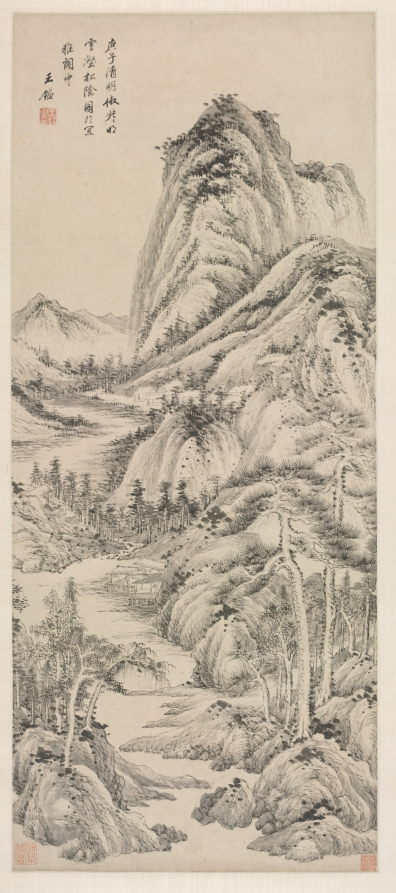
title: Shade of Pines in a Cloudy Valley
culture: China, Qing dynasty (1644-1911)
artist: Wang Jian (Chinese, 1598–1677)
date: 1660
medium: Hanging scroll; ink on paper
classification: Painting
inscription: Artist's inscription, signature, and seal: Painted at Yiyage in imitation of Wang Meng's Shade of Pines in a Cloudy Valley during the Qingming Festival of the gengzi year [1660]. Wang Jian [seal] Wang Jian zhi yin.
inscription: 2 additional seals: 1 of Bi Long 畢瀧 (18th c.); 1 unidentified.